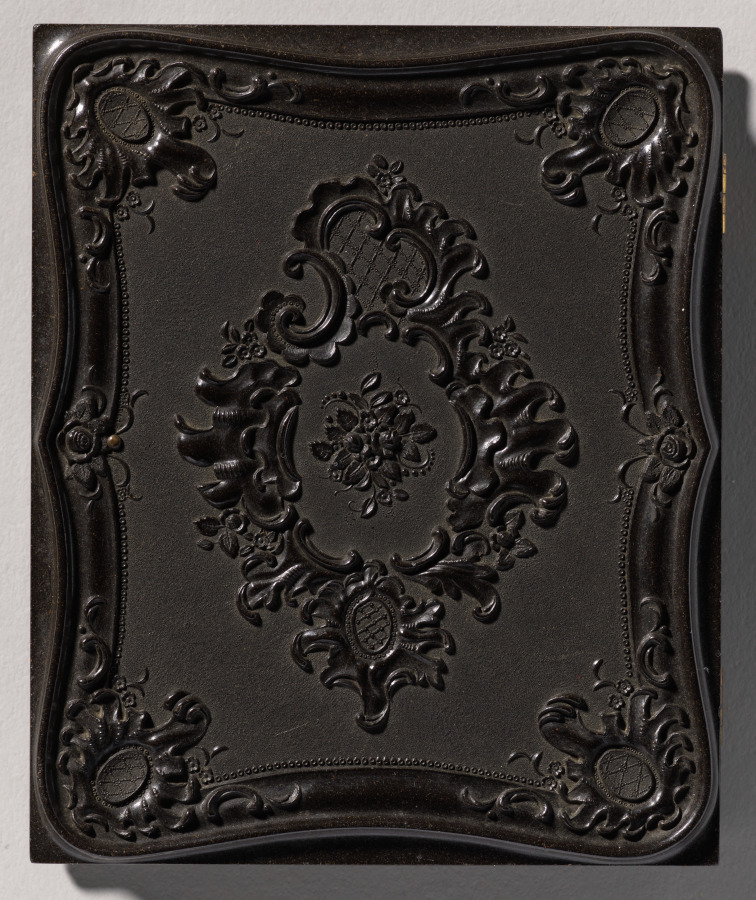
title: Child with Drum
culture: America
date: 1850s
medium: daguerreotype, quarter-plate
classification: Photograph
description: For this finely toned daguerreotype, an unknown photographer skillfully manipulated a bulky camera into a low vantagepoint, ensured even lighting, and positioned the quaintly dressed subject against a neutral background to create a charming portrait. The child was carefully coached to stare directly into the lens and to hold the toy drum and drumsticks convincingly. Perhaps the drum is meant to recall earlier times in American history and to symbolize its fight for independence.